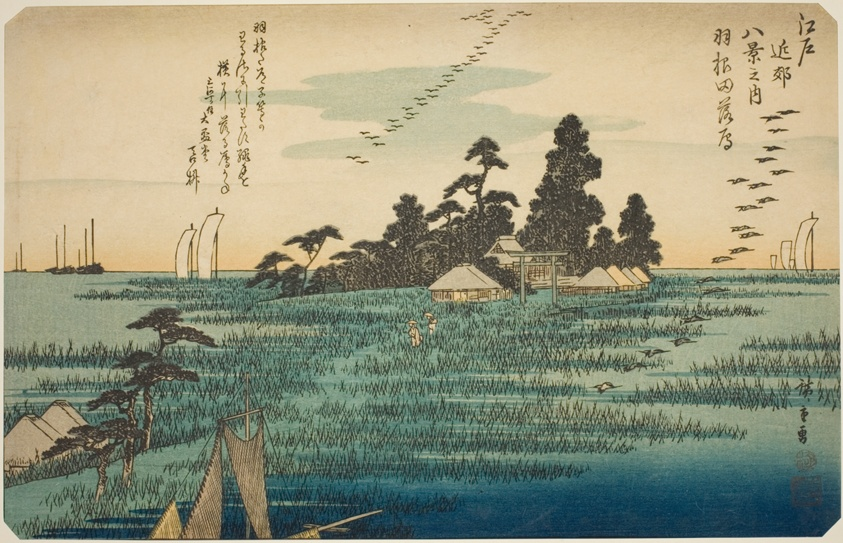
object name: Print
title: Descending Geese at Haneda (Haneda no rakugan), from the series "Eight Views in the Environs of Edo (Edo kinko hakkei no uchi)"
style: Japanese (culture or style)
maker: Utagawa Hiroshige 歌川 広重; Japanese, 1797-1858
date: c. 1837/38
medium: Color woodblock print; oban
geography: Japan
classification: woodblock print; print; asian art